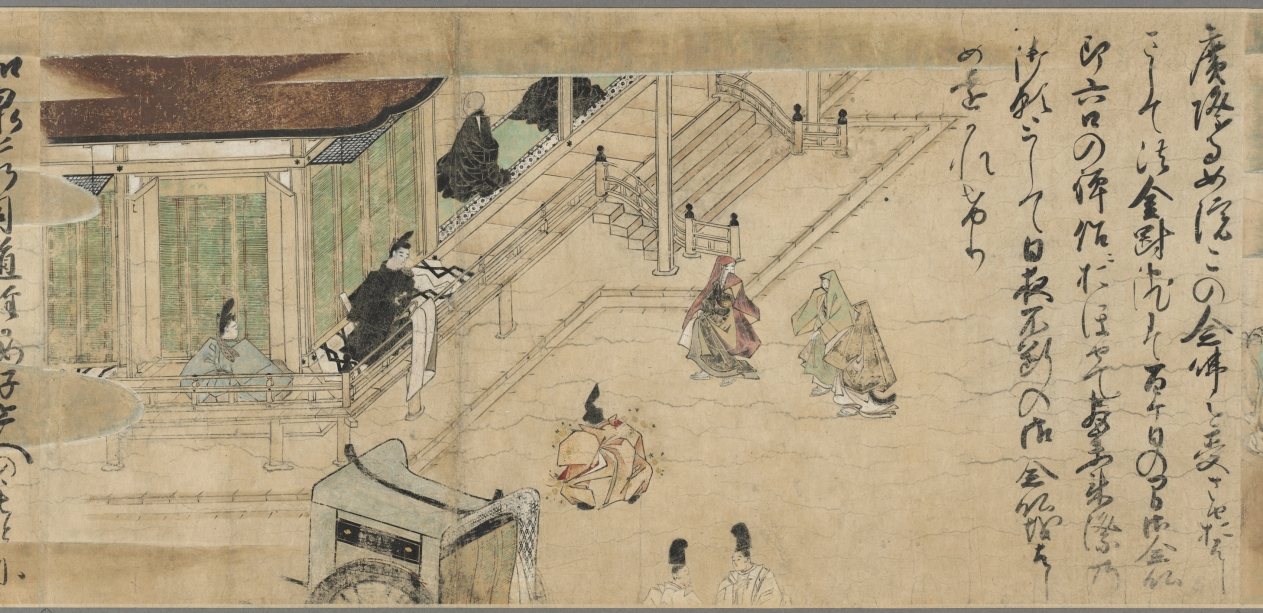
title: The Illustrated Miraculous Origins of the Yūzū Nenbutsu School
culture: Japan, Kamakura period (1185–1333)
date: early 1300s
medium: Handscroll; ink, color, and gold on paper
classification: Painting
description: This painting is the second of a set of two illustrated handscrolls. The first scroll depicts the biography of the Japanese Buddhist monk Ryōnin. This scroll begins with scenes of Ryōnin’s death and relates episodes illustrating the efficacy of following his teachings. Ryōnin asserted the total interconnectedness of all things and the spiritual benefit of chanting the name of the Buddha Amida for one another.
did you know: The other scroll from this two-scroll set belongs to the Art Institute of Chicago.